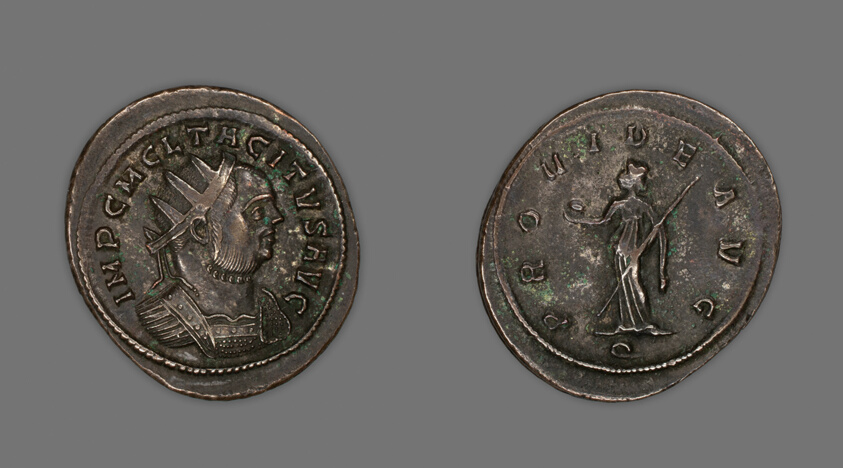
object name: Coin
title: Aurelianus (Coin) Portraying Emperor Tacitus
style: roman (ancient, style or period), ancient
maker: Roman, minted in Ticinum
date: 276 (January-June), issued by Tacitus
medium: Billon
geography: Roman Empire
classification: coin; ancient art